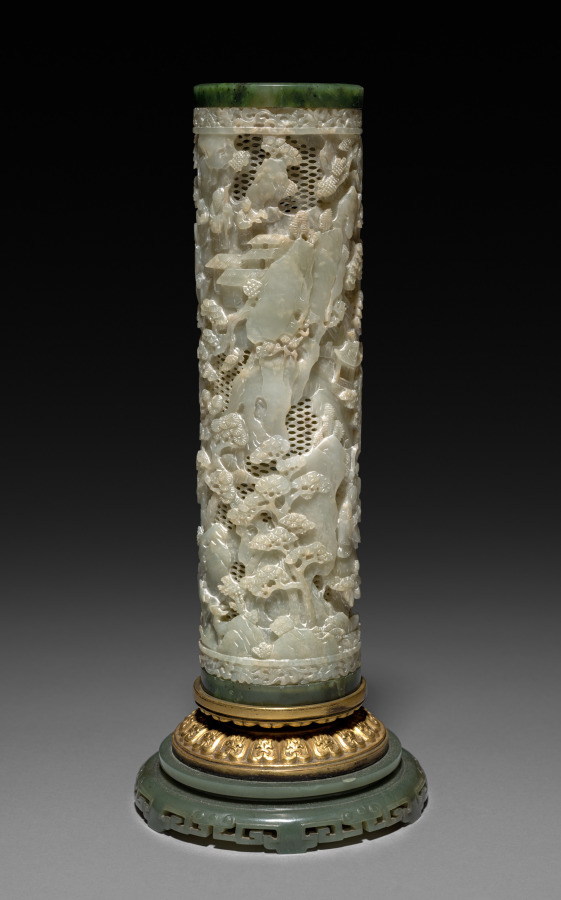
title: Cylinder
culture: China, Qing dynasty (1644-1911) or Republican period (1912-49)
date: 1800–1940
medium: jade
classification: Jade